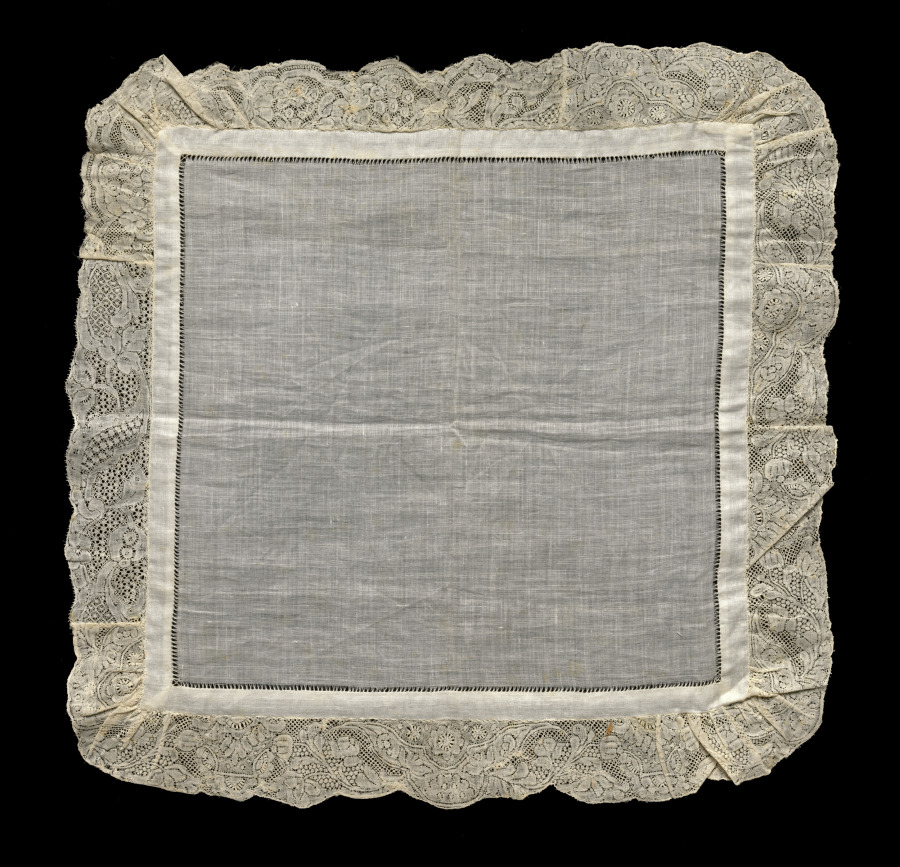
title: Lace Handkerchief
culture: Belgium, Binche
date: 1800s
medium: Plain weave linen center: needle lace (drawnwork) and bobbin lace edging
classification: Lace